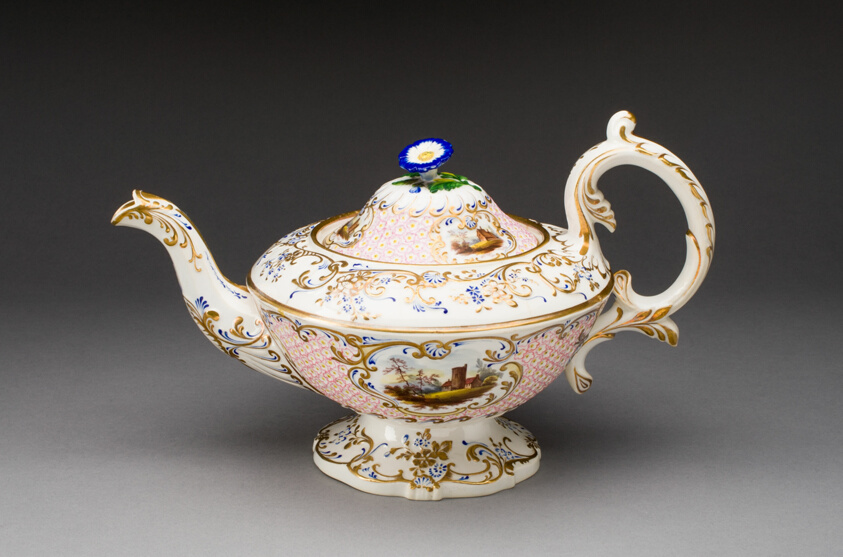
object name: Ceramics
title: Teapot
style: rococo revival, european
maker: Spode Pottery & Porcelain Factory; English, founded 1767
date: c. 1840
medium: Porcelain with polychrome enamels and gilding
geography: Stoke on Trent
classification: teapot; teaware; ceramics; porcelain; european decorative arts